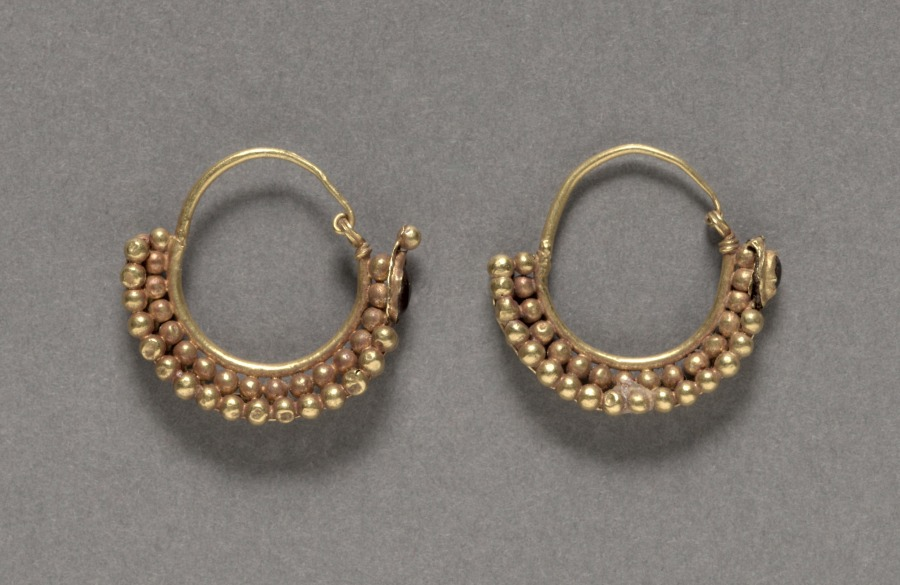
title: Earrings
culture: Syria, Roman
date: 100 BCE–100 CE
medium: gold and garnet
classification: Jewelry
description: Each of these earrings is formed from a simple hoop that ends in a hook-and-loop closure. An oval garnet is fixed below the loop on each earring; one earring has a much larger garnet, and a small ball affixed above the setting. The lower portion of each earring is decorated with two parallel rows of granules.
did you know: These two earrings are nearly identical; one lacks a gold bead above the garnet.